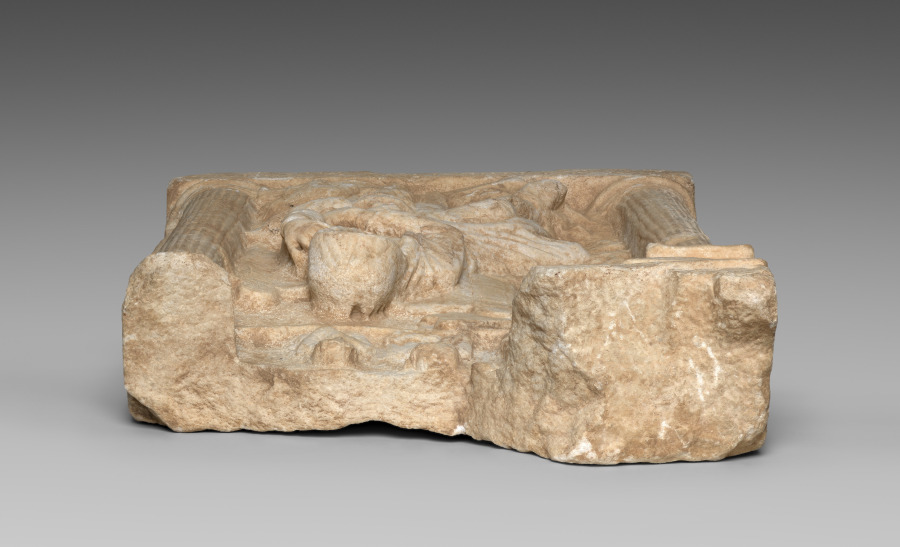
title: Grave Stele (Relief)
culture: Southern Anatolia, Pamphylia, Hellenistic Greek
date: c. 50 BCE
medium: marble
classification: Sculpture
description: The multiple figures, inscription, use of perspective, and architectural frame distinguish this ambitious relief as one of the most important of its type. The Greek inscription on the base reads, “To Sbardia, also named Tate, Eumelos, son of Aphrodisios, her father, [set this up].” The deceased is shown seated on an elaborate chair. A servant girl holding a fan suggests Sbardia’s high social standing. At the bottom right corner, a hen perches on an upturned basket, a symbol of “the good life.” The stele incorporates a “springing” gable supported by engaged half columns with simplified Corinthian capitals. Other features relate to beliefs about mortality and the afterlife. Above and to the left of her chair is her winged psyche (soul) shown leaving her body. Figures of the three fates are shown in the pediment above, reminding us that human life is finite.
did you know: The seated woman is depicted larger to visually emphasize her importance; her servant is in the background.